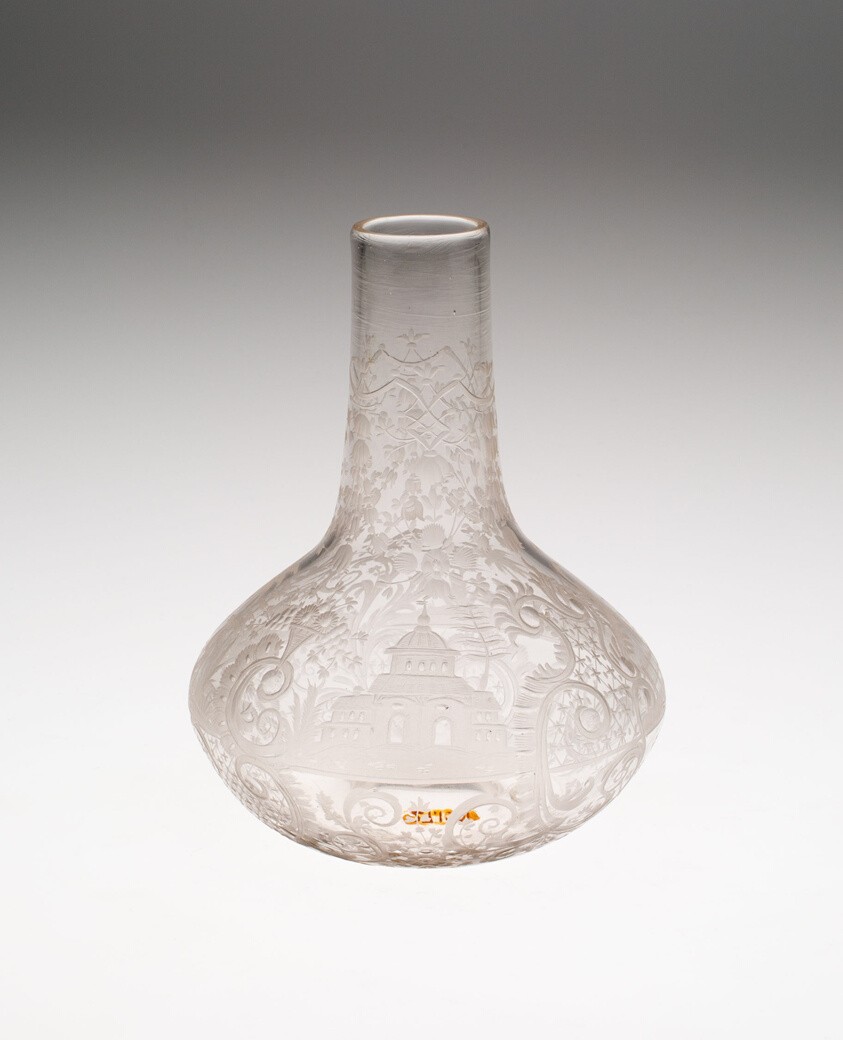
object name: Glass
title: Bottle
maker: Bohemia, Czech Republic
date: Mid 18th century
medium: Glass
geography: Bohemia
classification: glass; european decorative arts